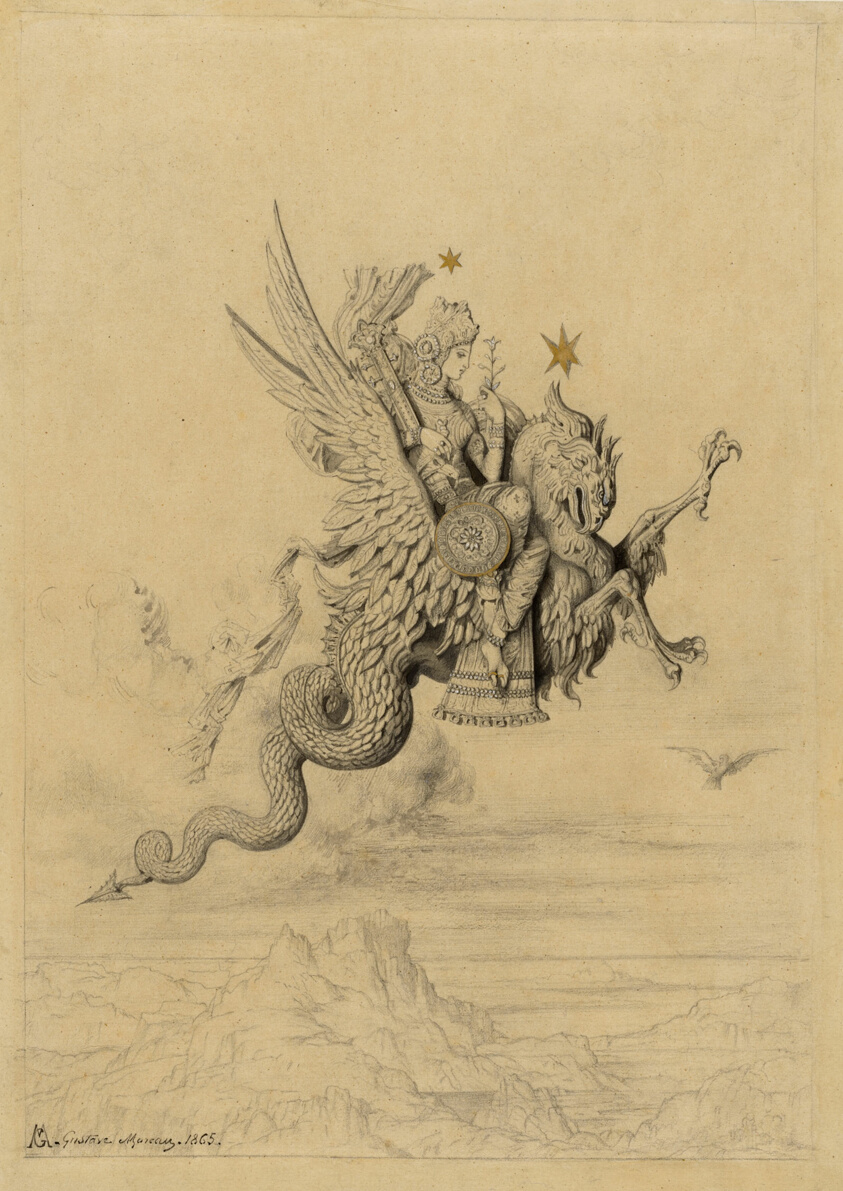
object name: Drawing and Watercolor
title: La Peri (Mythological Subject)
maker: Gustave Moreau (French, 1826-1898)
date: 1865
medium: Graphite, with brush and black ink, gray wash, and touches of gold metallic paint, heightened with traces of white gouache, on cream wove tracing paper, laid down on ivory wove paper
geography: France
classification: graphite; drawings (visual works); prints and drawing